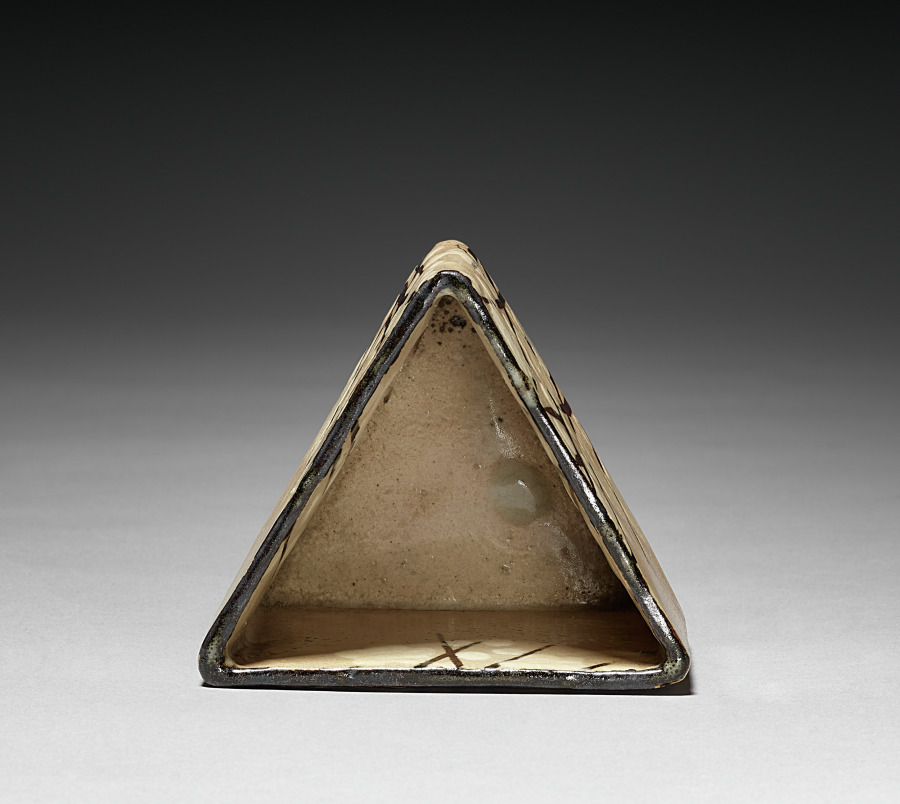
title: One of Five Serving Bowls (Mukozuke) with Prunus Design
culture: Japan, Edo period (1615–1868)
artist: school of Ogata Kenzan (Japanese, 1663–1743)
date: 1700s to mid-1800s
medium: Kyoto Ware: stoneware with underglaze iron oxide and slip decoration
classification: Ceramic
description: Note the rough, tan, clay bodies of these bowls with their deliberate irregularities. The design of branches was first painted in a black iron oxide, then the blossoms and buds in a white slip, followed by the application of a very thin transparent overglaze.